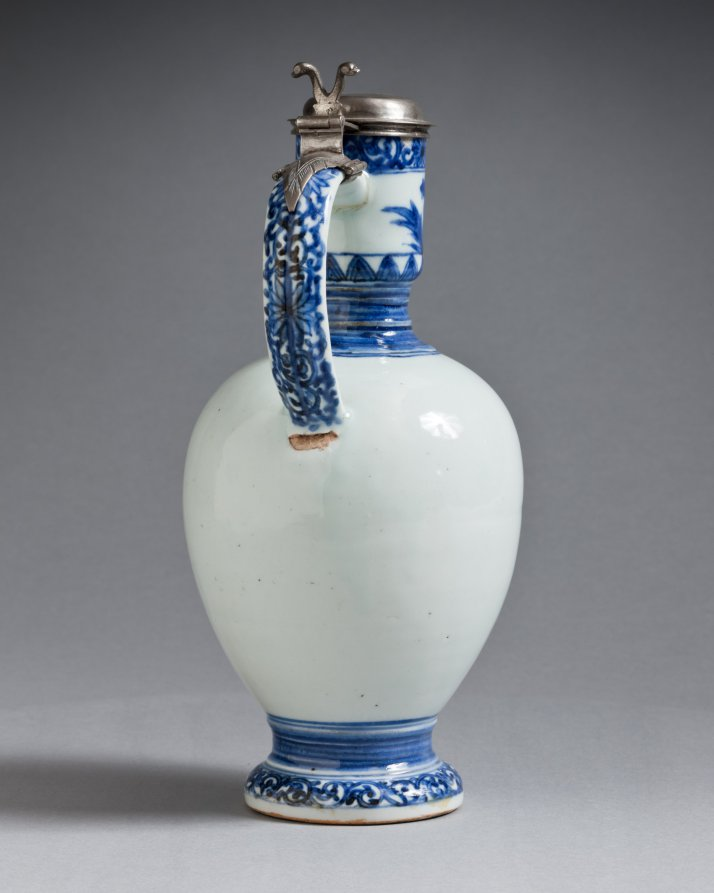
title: Jug with Silver Mounts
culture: Japan, Edo period (1615–1868)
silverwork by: Barent van Leeuwen (Dutch, 1637–1682)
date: c. 1662–76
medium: porcelain with underglaze blue decoration and silver mounts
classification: Ceramic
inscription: [on silver]: town mark for Amsterdam; lion rampant crowned (alloy mark for 0-934 silver); d (date letter for 1666), maker's mark of Barent van Leeuwen.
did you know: The coat of arms on this jug are those of the Valckenier family, active in the Dutch East India Company.